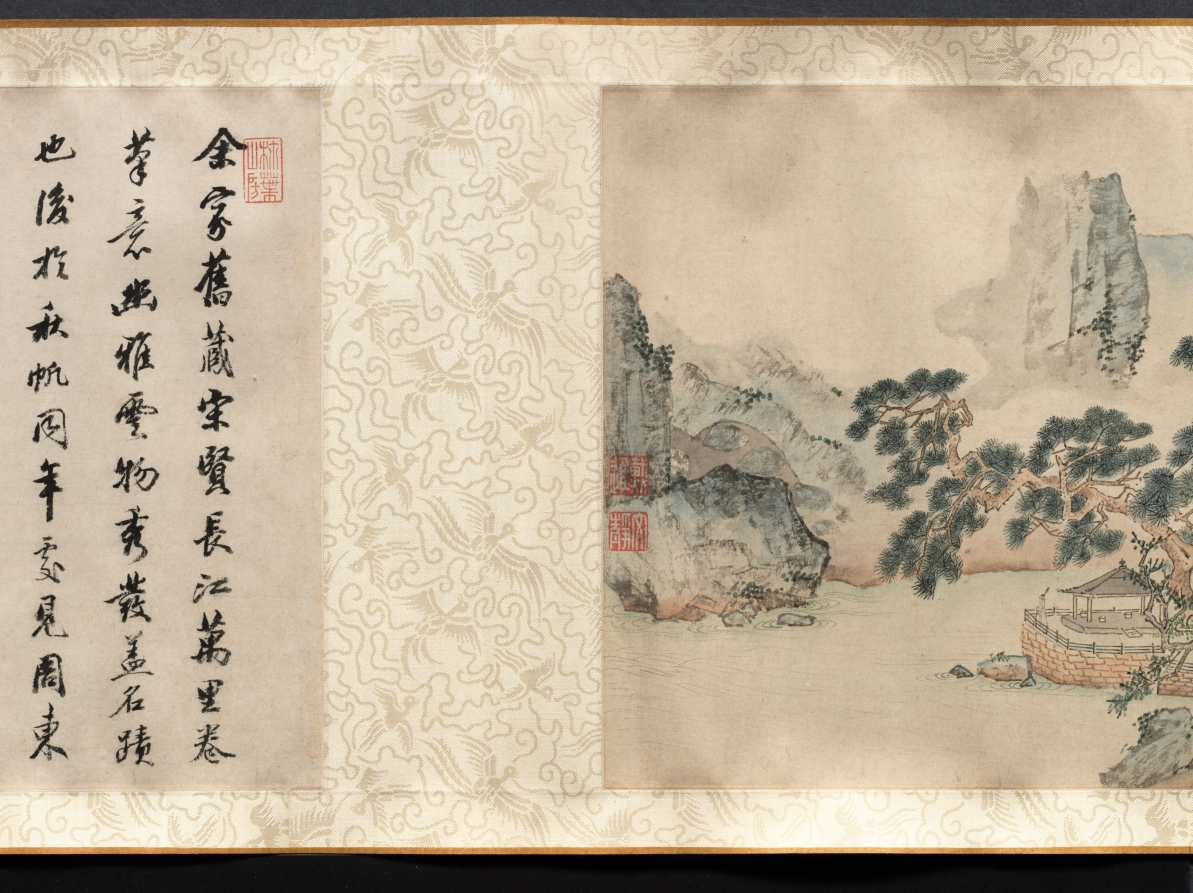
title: Ten Thousand Li of the Yangzi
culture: China, Ming dynasty (1368–1644)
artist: Dai Jin (Chinese, 1388–1462)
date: c. 1400s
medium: Handscroll; ink and color on paper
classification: Painting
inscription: Two colophons at end. Artist's seals: Dai Jin 戴進 and Wenjin 文進.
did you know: Dai Jin is traditionally considered the founder of the Zhe School, a style of landscape painting.